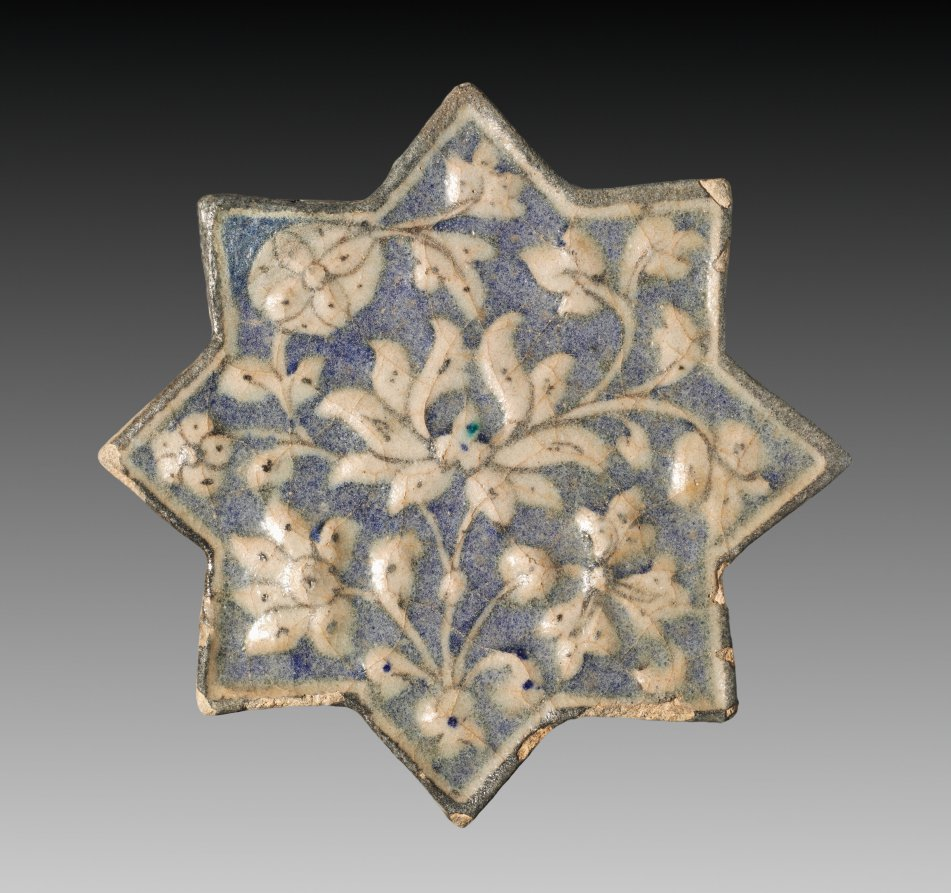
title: Wall Tile with Lotus Blossom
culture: Iran, probably Sultanabad, Ilkhanid period (1256–1353)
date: c. 1300–50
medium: fritware with molded and underglaze-painted design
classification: Ceramic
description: One popular method of covering large wall sections with ceramic decoration was to combine star-shaped tiles with cross-shaped tiles.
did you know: Some of the design relief has been molded as well as being built up in the white slip.